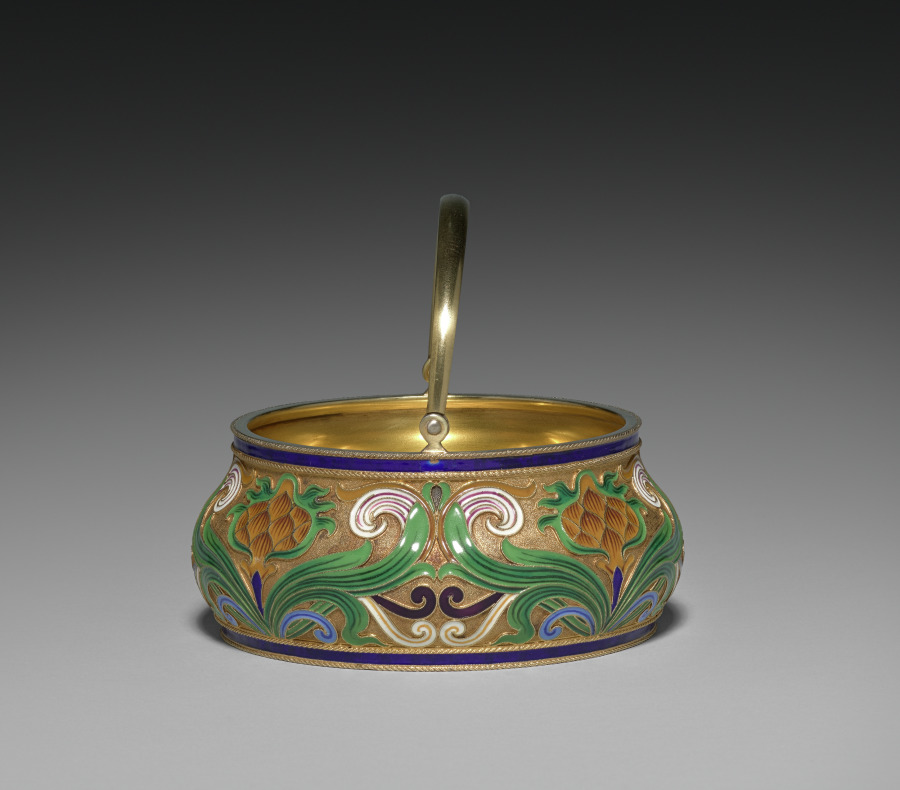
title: Jam (Varenye) Basket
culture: Russia, St. Petersburg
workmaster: attributed to Feodor Ivanovich Rückert (Russian, 1840–1917)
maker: House of Fabergé (Russian, 1842–1918)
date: 1887–96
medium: silver gilt, opaque cloisonné enamel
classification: Miscellaneous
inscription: 84, St. George [assay mark for Moscow, 1882-1896]; C. Fabergé (in Cyrillic); double-headed eagle [imperial warrant]; 10593 scratched.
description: A particularly Russian component of this tea service is this little basket, meant to hold fruit preserved in a sweet juice, called varenye. At Russian tea, varenye was strained and served over cakes or biscuits in a similar way that the English take jam with scones at high tea.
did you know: This jam (varenye) basket is part of a larger tea set.